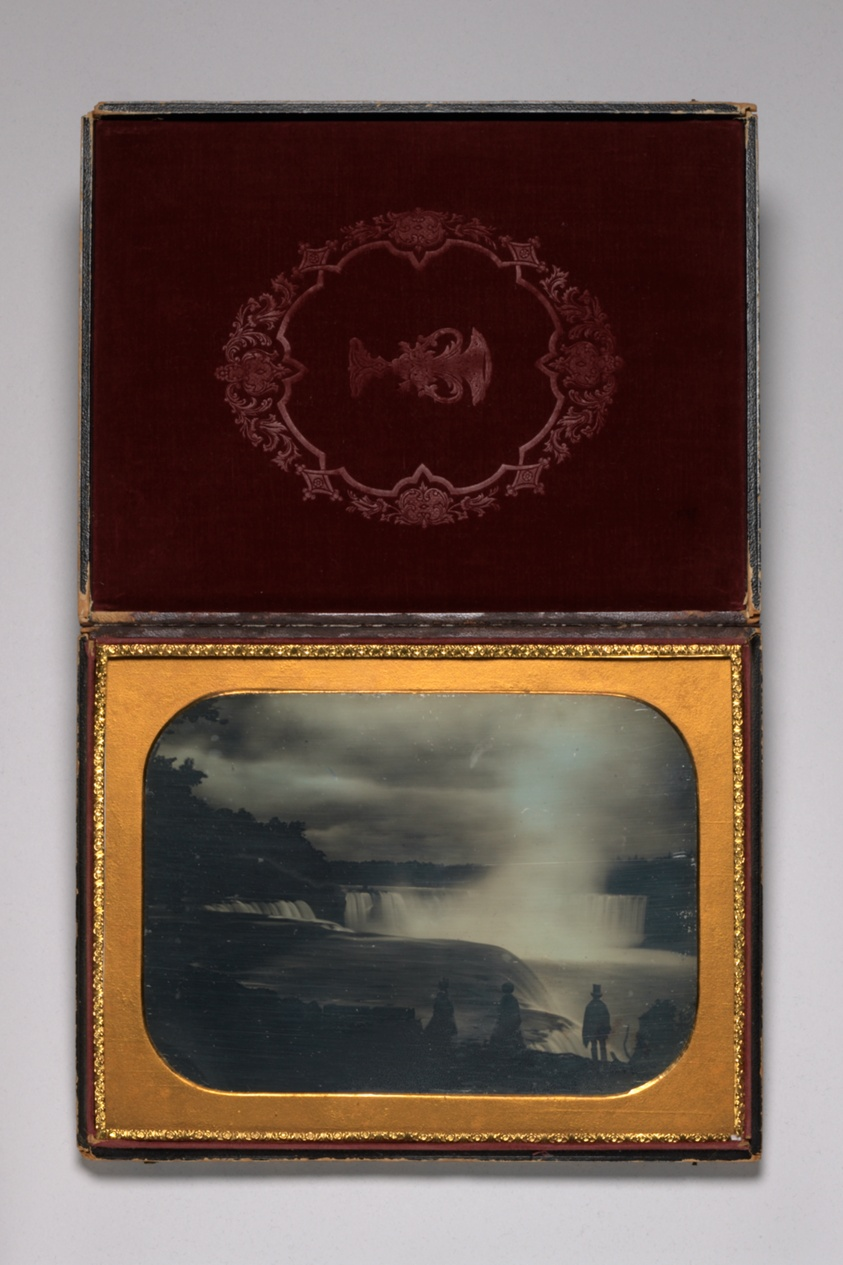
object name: Photograph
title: Untitled (Niagara Falls)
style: 19th century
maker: Attributed to Platt D. Babbitt; American, died 1879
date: c. 1853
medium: Daguerreotype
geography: United States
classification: daguerreotype; photographic process; photography; photograph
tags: Collected by Hugh Edwards